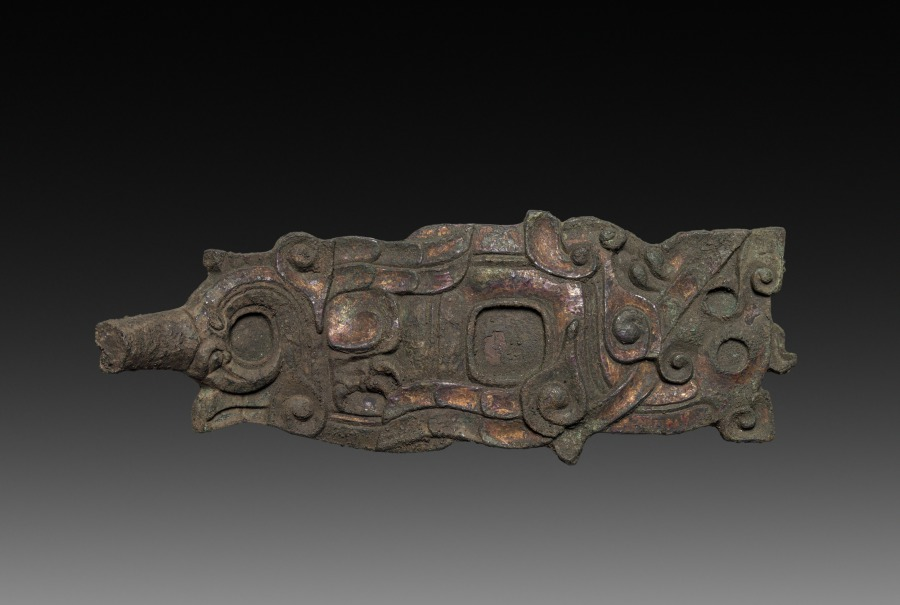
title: Clasp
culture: China, Tang dynasty (618-907)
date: 618–907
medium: bronze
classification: Jewelry